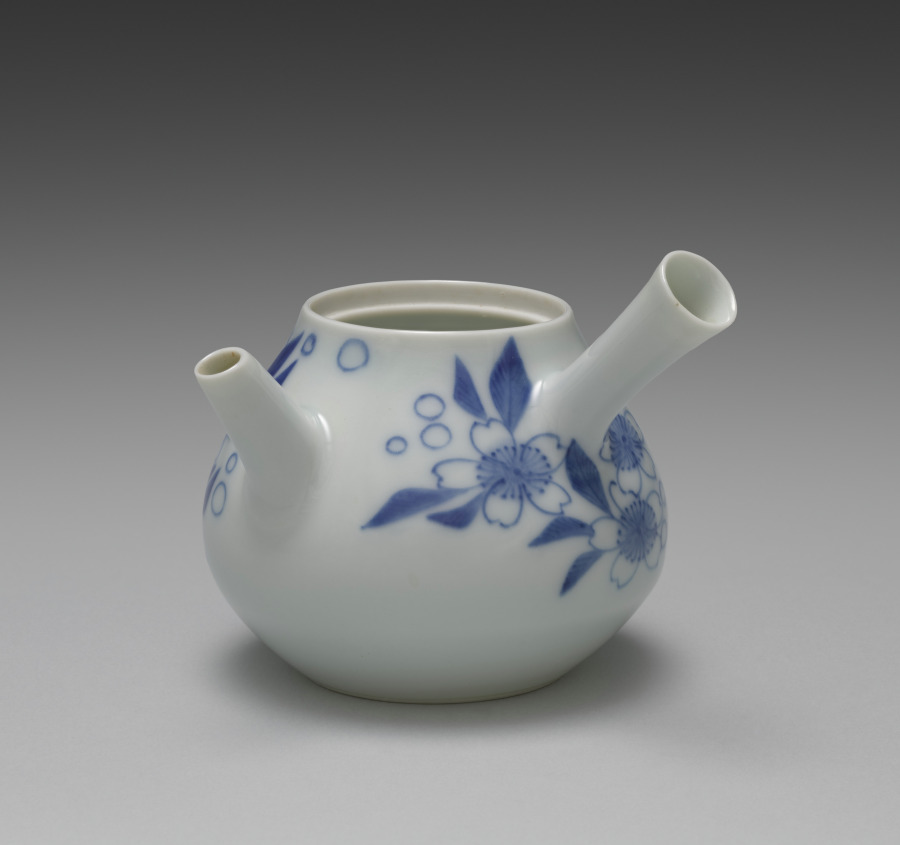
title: Teapot with Cherry Blossoms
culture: Japan, Taishō period (1912–26) or Shōwa period (1926–89)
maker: Seifū Yohei IV (Japanese, 1872–1951)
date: 1914–46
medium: Porcelain with underglaze blue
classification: Ceramic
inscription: 清風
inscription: 清風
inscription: 清風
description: This teapot with mountain cherry blossom motifs has its design in underglaze cobalt blue. It runs over both the pear-shaped body and the recessed lid, with its pointed, jewel-shaped handle. There is a faint bluish-green tint to the glaze. The mark impressed into the base of this work appears to be one used by Yohei III. However, the box inscription is brushed in a hand matching that of Yohei IV, and while the seal on the lid is one often used by Yohei III, that next to the signature on the back of the lid is one generally used by Yohei IV. The signature, too, resembles others belonging to Yohei IV. As the design, technique, and object named on the box accurately describe the contents, it seems unlikely, but not impossible, that it is mismatched. There are many cases in which Yohei III works are contained in boxes with inscriptions, seals, and a signature by Yohei IV. However, in such examples, Yohei IV clearly identifies himself as authenticating the work of his father and often includes his father’s Imperial Household Artist seal. This may be an example of a transitional piece in which Yohei IV has used his father’s mark on the base of his own work.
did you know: Cherry blossoms mark the arrival of spring, and their short-lived beauty is deeply anticipated and appreciated.